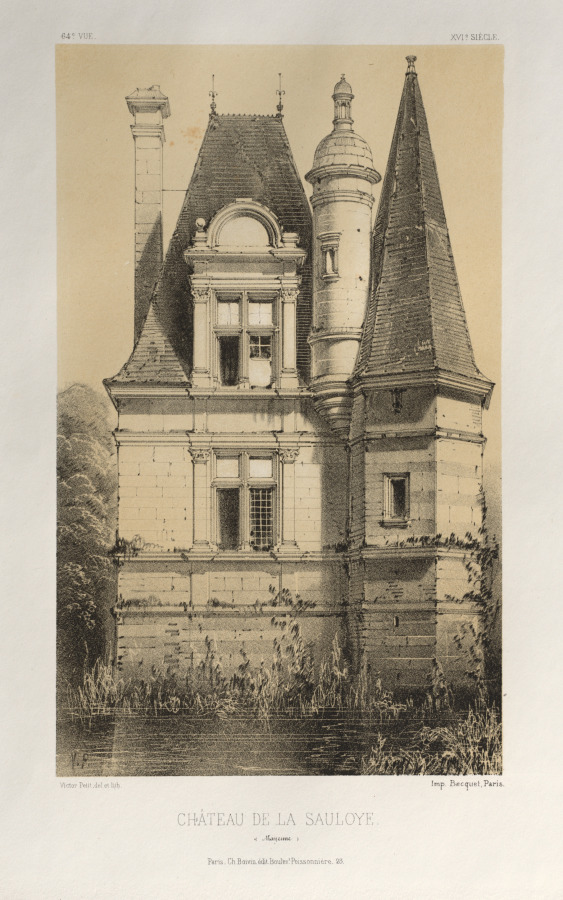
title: Architecture Pittoresque ou Monuments des XVeme. Et XVIeme. Siecles: Chateaux de France des XV et XVI Siecles: Pl. 64, Château De La Sauloye (Mayenne)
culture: France, 19th century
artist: Victor Petit (French, 1817–1874)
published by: Charles Boivin (publisher and editor); Lith de Godard a Paris (printer)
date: 1860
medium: lithograph with tint stone, from portfolio of 100 lithographs with tint stone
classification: Print